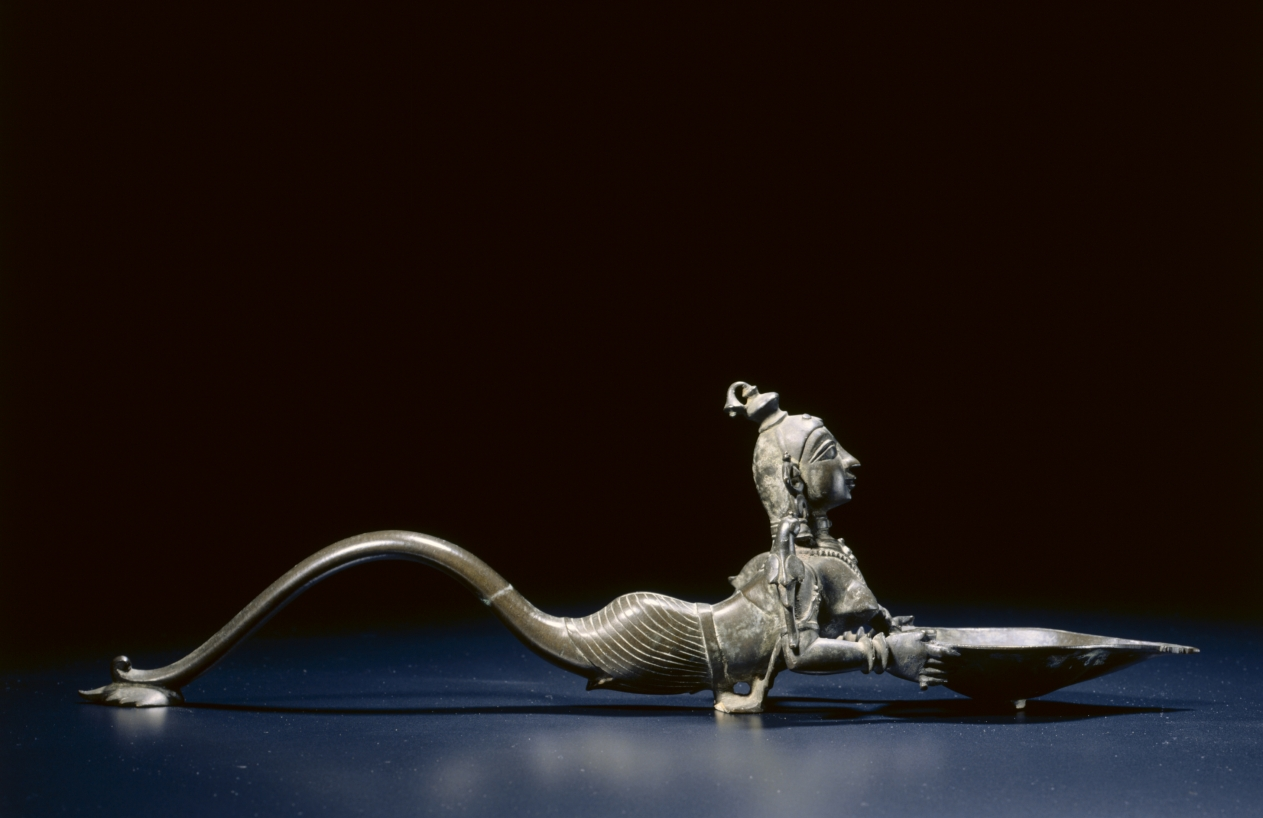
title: Votive Lamp (Deepa Lakshmi)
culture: South India, Chingleput district (Madras), 18th-19th Century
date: 1700s-1800s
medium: bronze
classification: Sculpture